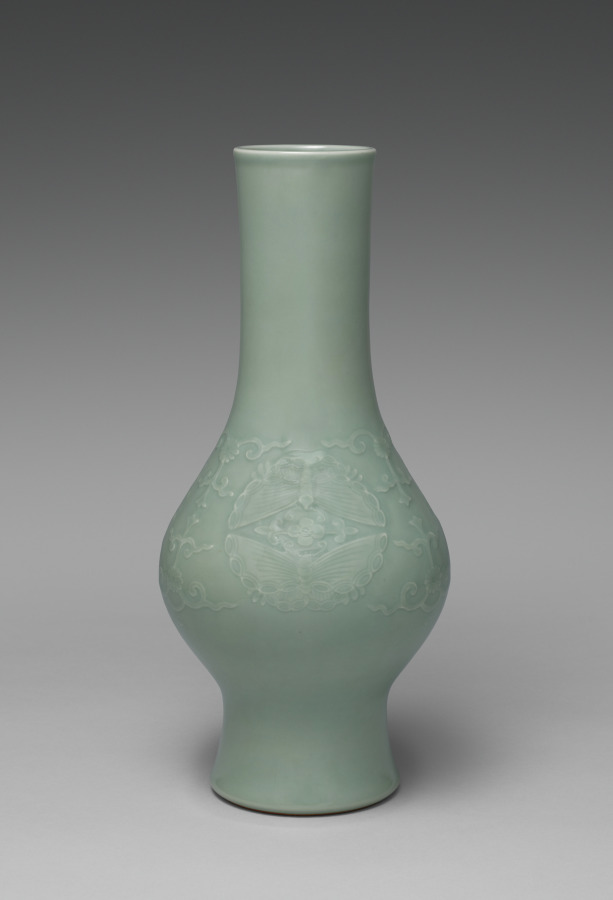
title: Flower Vase with Butterflies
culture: Japan, Meiji period (1868–1912)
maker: Seifū Yohei III (Japanese, 1851–1914)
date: 1907–14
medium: Porcelain with green glaze and carved and molded design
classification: Ceramic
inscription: 清風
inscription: 【印】 帝室技芸員。 【印】 清風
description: This flower vase has two pairs of butterflies forming low-relief roundels, one on each side. The butterflies face each other, one positioned above and the other below, their antennae curling up to a centrally placed floral motif. In the spaces between the pairs of insects, additional raised floral designs are set within vinelike extensions reminiscent of open metalwork banners and canopy adornments in Buddhist temples. The lip and the foot of the vase remain white, and the thinning of the green glaze within the higher-relief portions of the body decoration accentuates the designs. This work, like the sweets bowl CMA 2022.232, has a box lid attribution to Yohei III by Yohei IV. His inscription is dated to the autumn of 1919.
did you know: The box identifies the vase as in the hisokuyō (Chinese mise yao 秘色窯), or “mysterious color ware,” style.